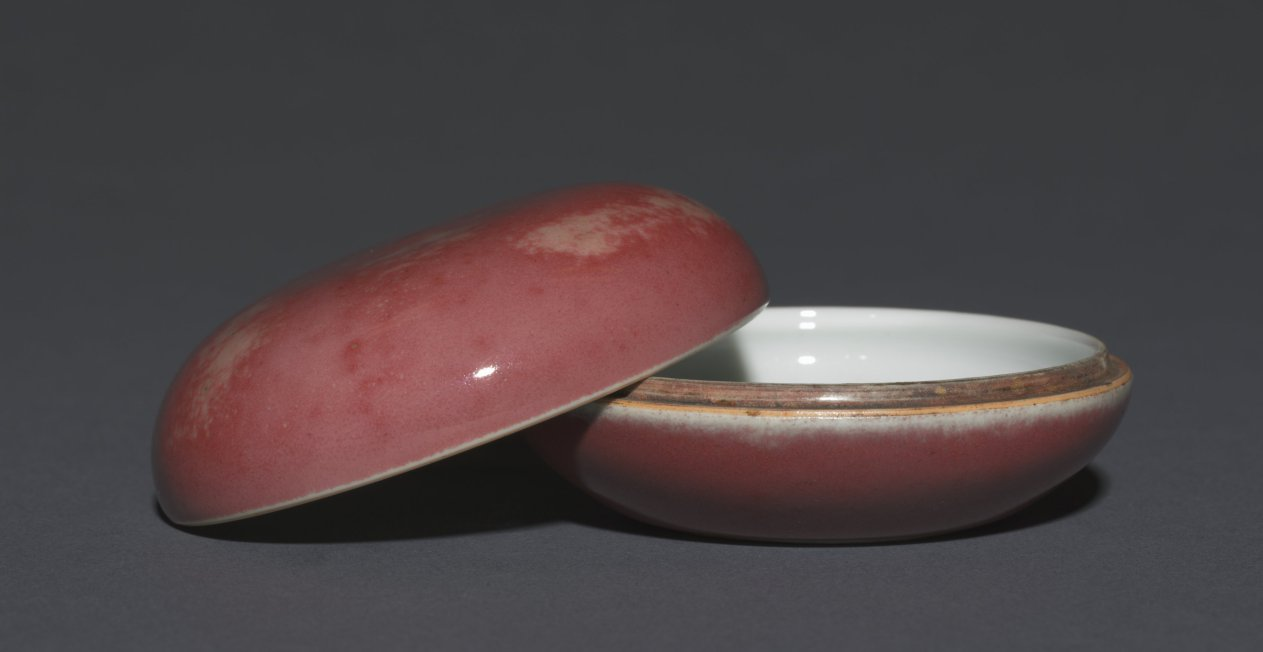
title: Seal Color Box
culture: China, Jiangxi province, Jingdezhen, Qing dynasty (1644-1911), Kangxi period (1662-1722)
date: 1662–1722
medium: porcelain with "peach bloom" glaze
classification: Ceramic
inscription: 大清康熙年制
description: The "peach-bloom" glaze developed during the Kangxi era has been described as "drunken with beauty."